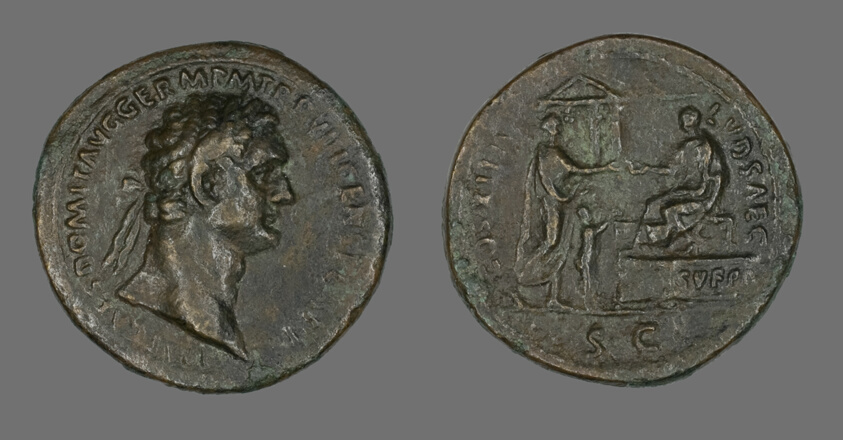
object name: Coin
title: Sestertius (Coin) Portraying Emperor Domitian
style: imperial (roman), ancient, roman (ancient, style or period)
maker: Roman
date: 88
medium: Bronze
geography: Roman Empire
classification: coin; ancient art